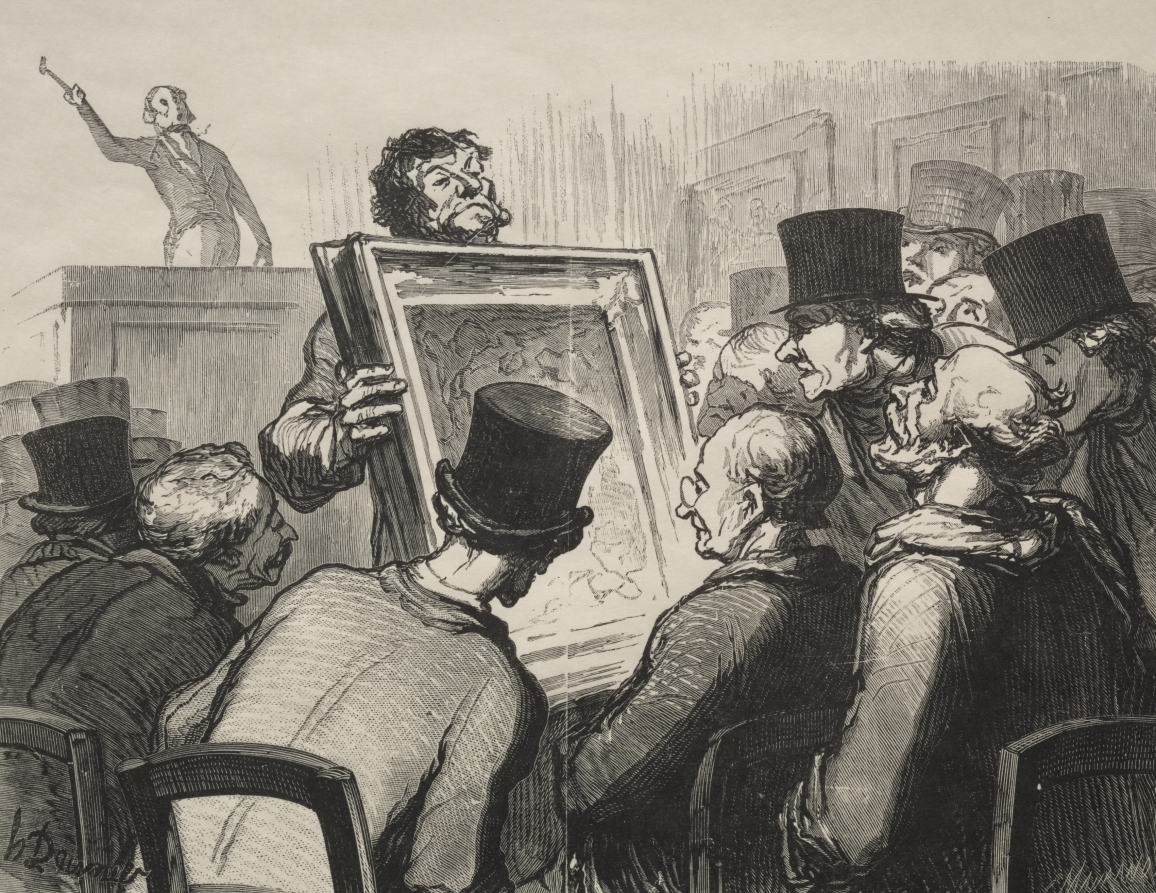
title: Painting Enthusiasts at Auction House Bouillon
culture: France, 19th century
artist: Honoré Daumier (French, 1808–1879)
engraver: Charles Maurand (French, 1824–1904)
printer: François Louis Schmied (Swiss, 1873–1941)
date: 1862, printed 1920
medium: wood engraving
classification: Print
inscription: Lower margin, pencil: 42/75 ; red stamp: FLS